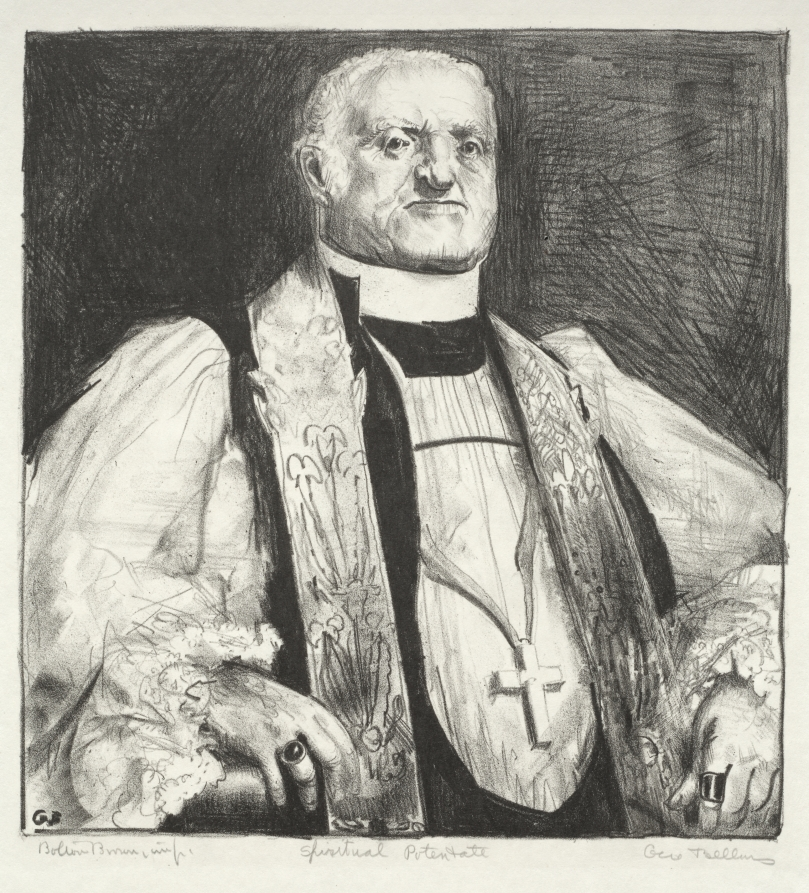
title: Spiritual Potentate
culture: America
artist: George Bellows (American, 1882–1925)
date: 1923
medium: lithograph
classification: Print